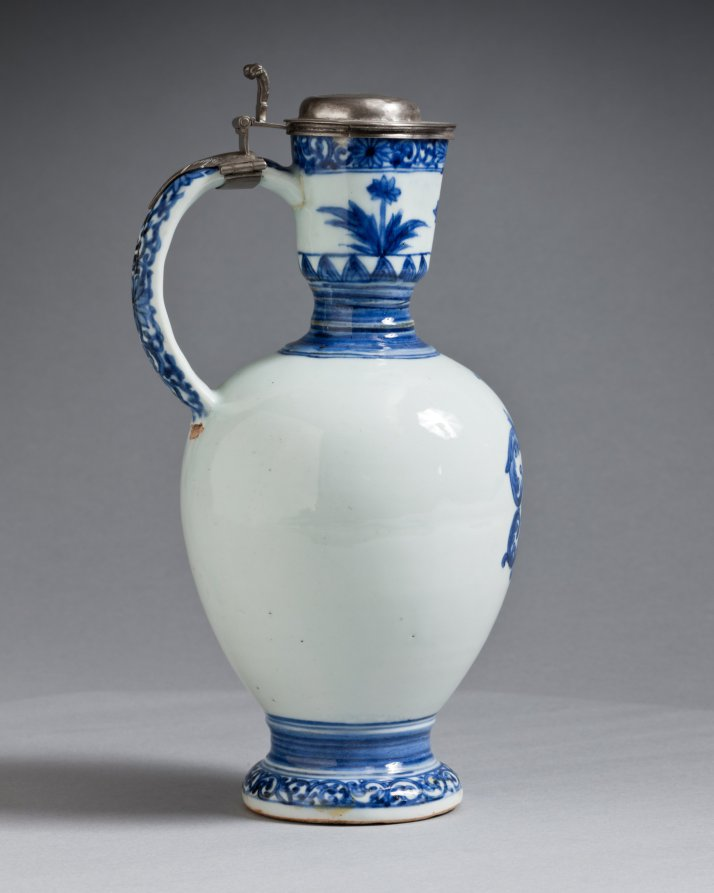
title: Jug with Silver Mounts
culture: Japan, Edo period (1615–1868)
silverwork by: Barent van Leeuwen (Dutch, 1637–1682)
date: c. 1662–76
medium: porcelain with underglaze blue decoration and silver mounts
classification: Ceramic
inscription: [on silver]: town mark for Amsterdam; lion rampant crowned (alloy mark for 0-934 silver); d (date letter for 1666), maker's mark of Barent van Leeuwen.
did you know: The coat of arms on this jug are those of the Valckenier family, active in the Dutch East India Company.